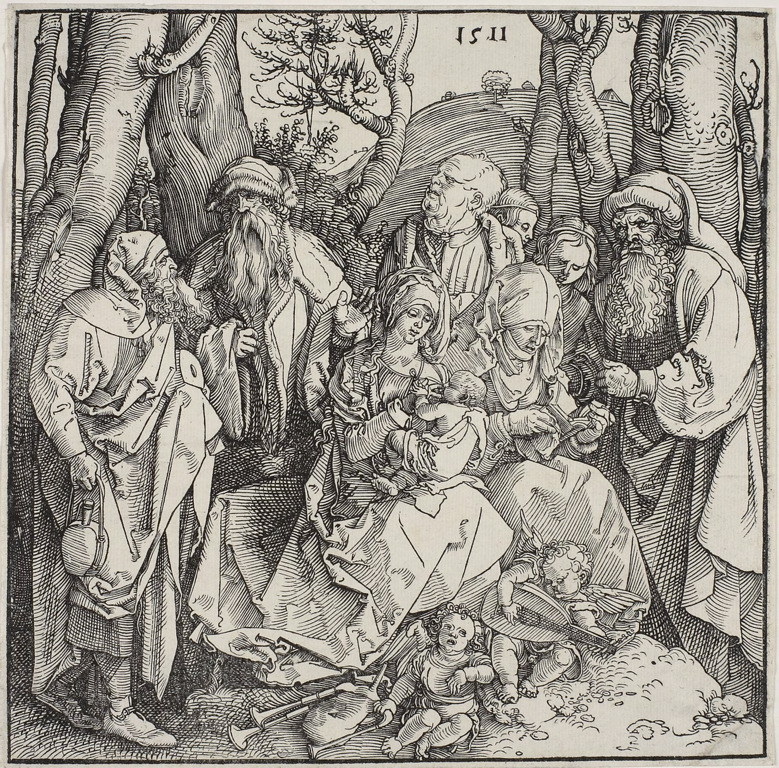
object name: Print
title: The Holy Kinship and Two Musical Angels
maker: Albrecht Dürer (German, 1471-1528)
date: 1511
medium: Woodcut in black on ivory laid paper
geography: Germany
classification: woodcut; print; prints and drawing; paper